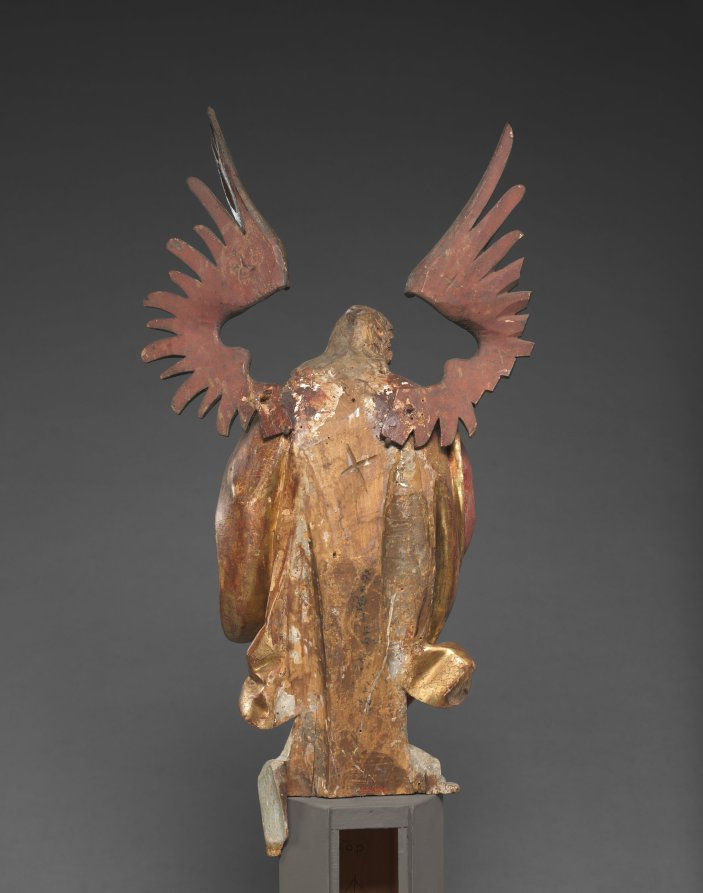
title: Lute-playing Angel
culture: Austria, Tyrol, early 16th Century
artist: Hans Schnatterpeck (Austrian)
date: made shortly after 1503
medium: Black Forest balsalm fir with polychromy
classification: Sculpture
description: This sculpture was originally placed at the top of the altarpiece of the high altar in the church at Nieder Lana, near Meran, in the South Tyrol (now part of present-day North Italy). The sculptor had contracted in 1503 to complete this altar within eight years for the payment of 1,600 gilders. Hans Schnatterpeck was originally from Landsberg am Lech in Bavaria. By 1478-79 he had settled in Meran where he operated the leading workshop in the area. This angel is a surviving element from his most famous work, the largest Gothic altarpiece of the Alpine region. Other elements survive in various public and private collections.